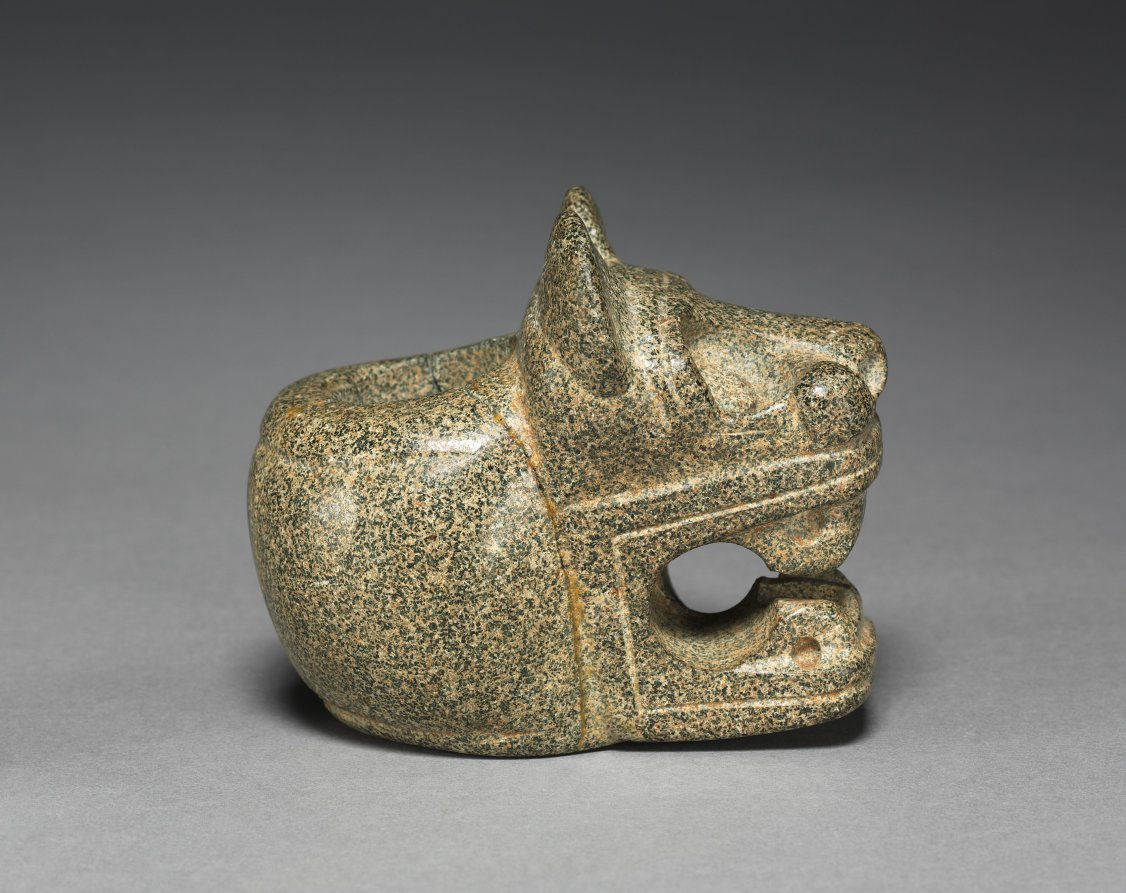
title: Ceremonial Mace (Club) Head: Feline (Jaguar?)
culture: Costa Rica, Southern Nicoya region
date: c. 300 BCE–600 CE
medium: stone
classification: Stone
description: Probably once mounted on wooden shafts, these objects could have served as symbols of chiefly authority, group insignia, the heads of ceremonial weapons, or all three. They eventually were placed in elite graves. The bird may be a male curassow and the feline, a jaguar.